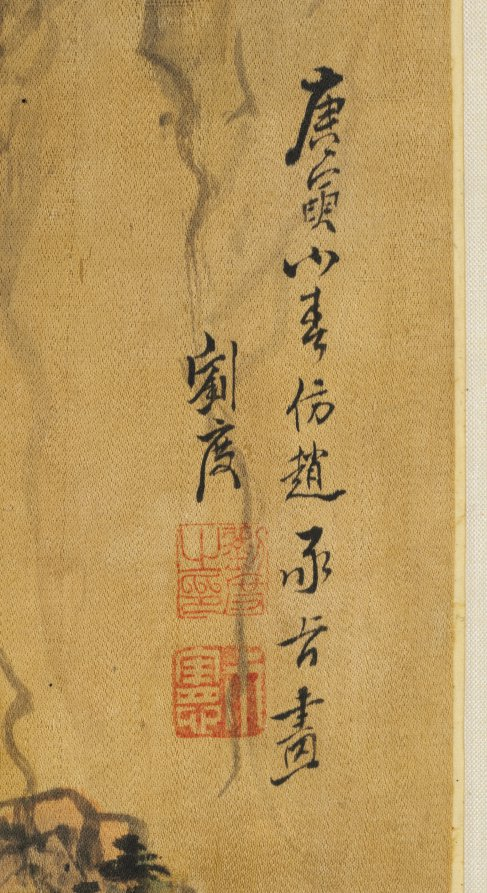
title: The Peach Blossom Spring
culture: China, Ming dynasty (1368–1644)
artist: Liu Du (Chinese, active c. 1628-after 1653)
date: 1650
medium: hanging scroll; ink and light color on satin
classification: Painting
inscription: Artist's inscription, signature, and 2 seals at middle right edge: In the tenth month of the gengyin year [1650], painted in imitation of Zhao Chengzhi [Chao Mengfu]. Liu Du [seals] Liu Du zhi yin; Shu xian.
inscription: 2 additional seals of Low Chuck Tiew 劉作籌 (1911–1993).